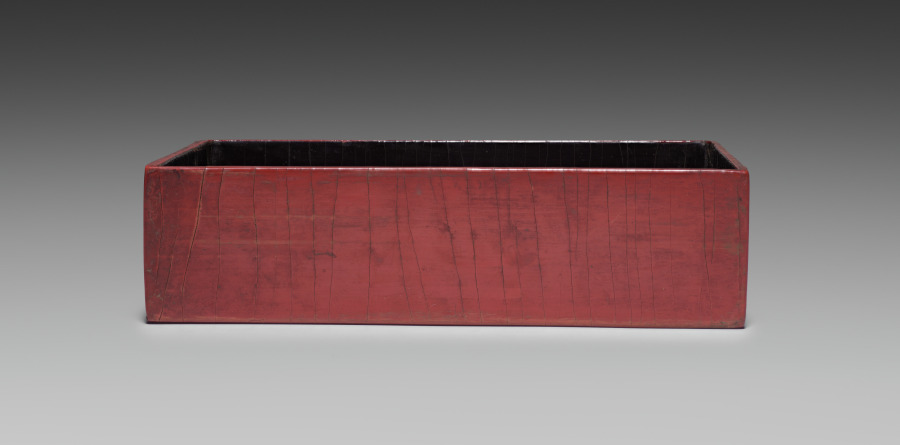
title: Drawer for a Tihong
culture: China, Ming dynasty (1368-1644), Wanli reign (1572-1620)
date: 1585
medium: carved cinnabar lacquer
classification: Lacquer